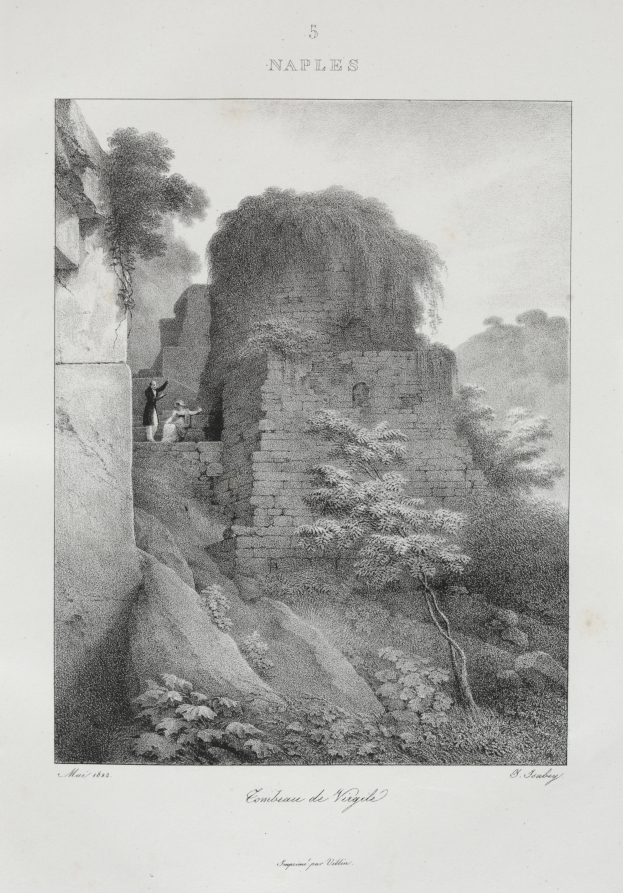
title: Voyage en Italie en 1822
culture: France, 19th century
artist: Jean-Baptiste Isabey (French, 1767–1855)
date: 1833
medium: lithograph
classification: Bound Volume